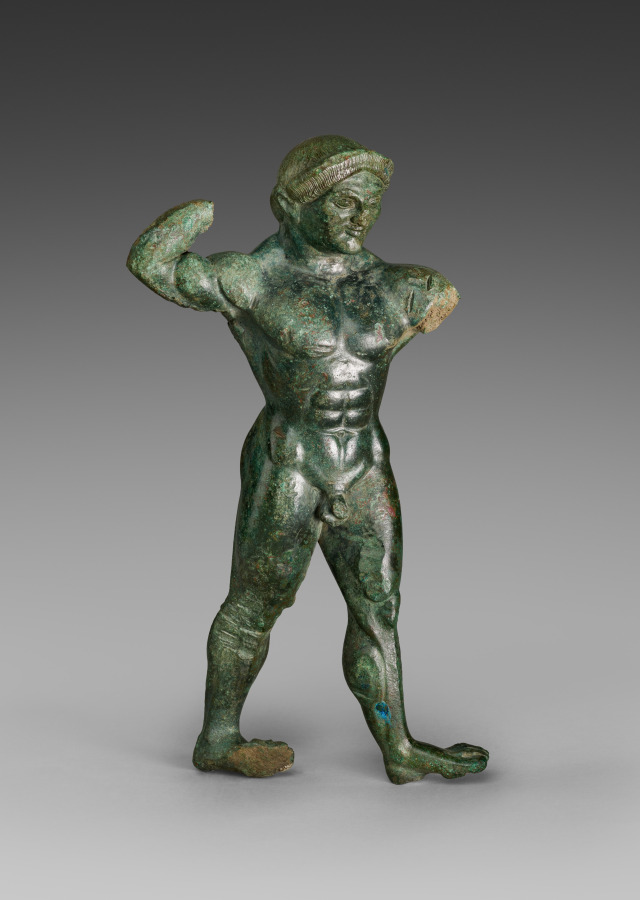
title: Statuette of Herakles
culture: Greek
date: 510–500 BCE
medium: bronze (solid cast)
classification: Sculpture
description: Striding forward with his left foot, this nude figure turns his torso and raises his tightly bent right arm behind his head. Despite significant damage, the statuette conveys a naturalistic sense of form and movement rarely seen in early Greek art. Its most striking feature is its powerful physique, with sharply defined, bulging muscles. Formerly called an athlete and assumed to have held a javelin or discus, the figure likely depicts the hero Herakles, revered for his strength and often shown in this smiting pose, wielding a club. Though usually bearded in this period, this representation emphasizes his youthfulness, with an idealized face and carefully arranged hair.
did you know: This robust figure exudes power, despite his damaged feet and missing hands.